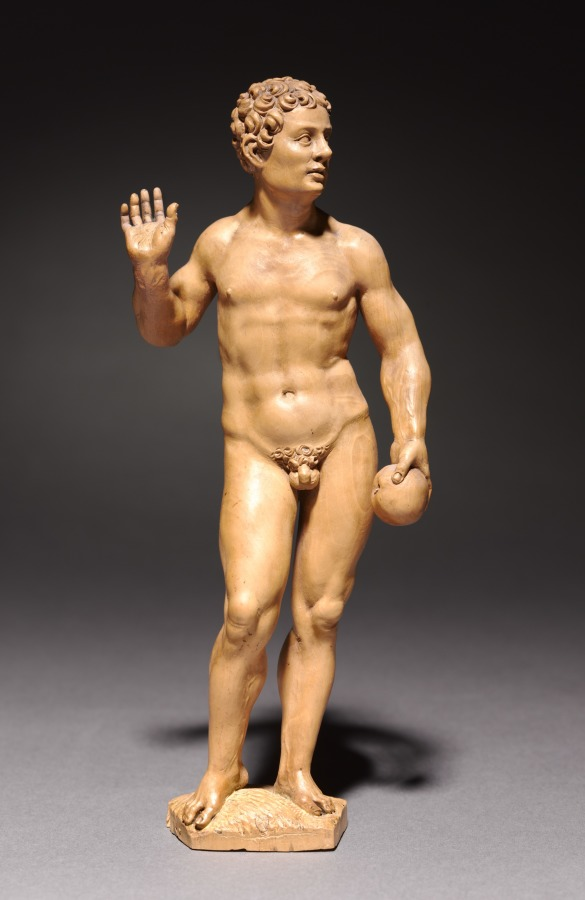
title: Adam and Eve (pair of statuettes)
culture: Germany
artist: Daniel Mauch (German, 1477–1540)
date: c. 1535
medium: boxwood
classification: Sculpture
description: Mauch straddled the late medieval and Renaissance traditions in his career. These small-scale statuettes, however, each made from a single piece of boxwood, stem from the most progressive strands of Renaissance art in southern Germany, closely connected to developments in both Italian and German bronze sculpture. The bodies reveal Mauch's careful study of human anatomy as well as a rapport with Albrecht Dürer's well-known print of the same subject.